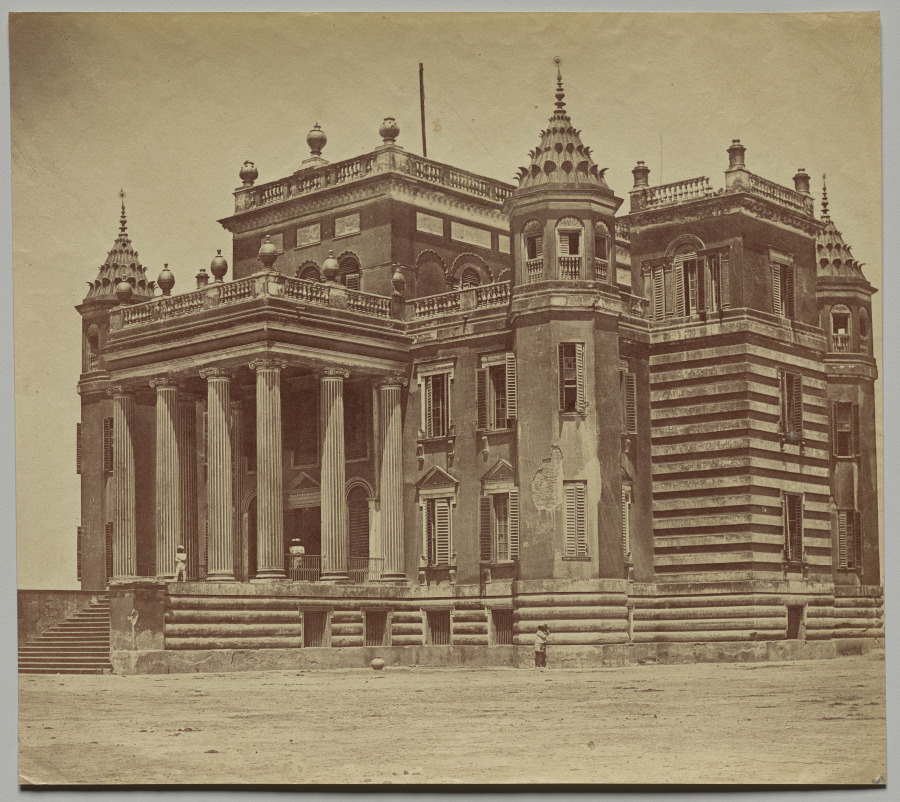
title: The Dilkoosha Palace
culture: England, 19th century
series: Lucknow After the Siege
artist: Felice A. Beato (British, 1832–1909)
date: 1858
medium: albumen print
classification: Photograph